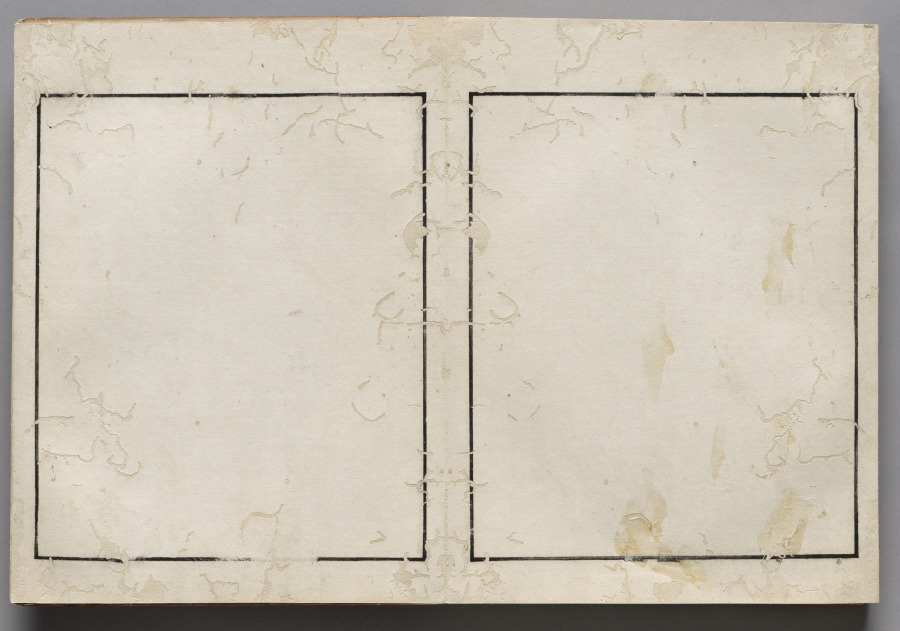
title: Album of Actor Portraits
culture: Japan, Edo period (1615–1868)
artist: Shōrakusai (Japanese)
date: c. 1790–1810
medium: accordion-style album; ink and color on silk mounted on paper and ink on paper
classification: Bound Volume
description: The paintings in this album show Kabuki actors costumed for their roles in a variety of plays. The characters are identified in the paper cartouches affixed to the paintings. While each painting is on silk that has been pasted into the album, the poems on some of the facing pages have been written in ink directly onto the page.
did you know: This album contains paintings of Kabuki actors who performed in the city of Osaka.